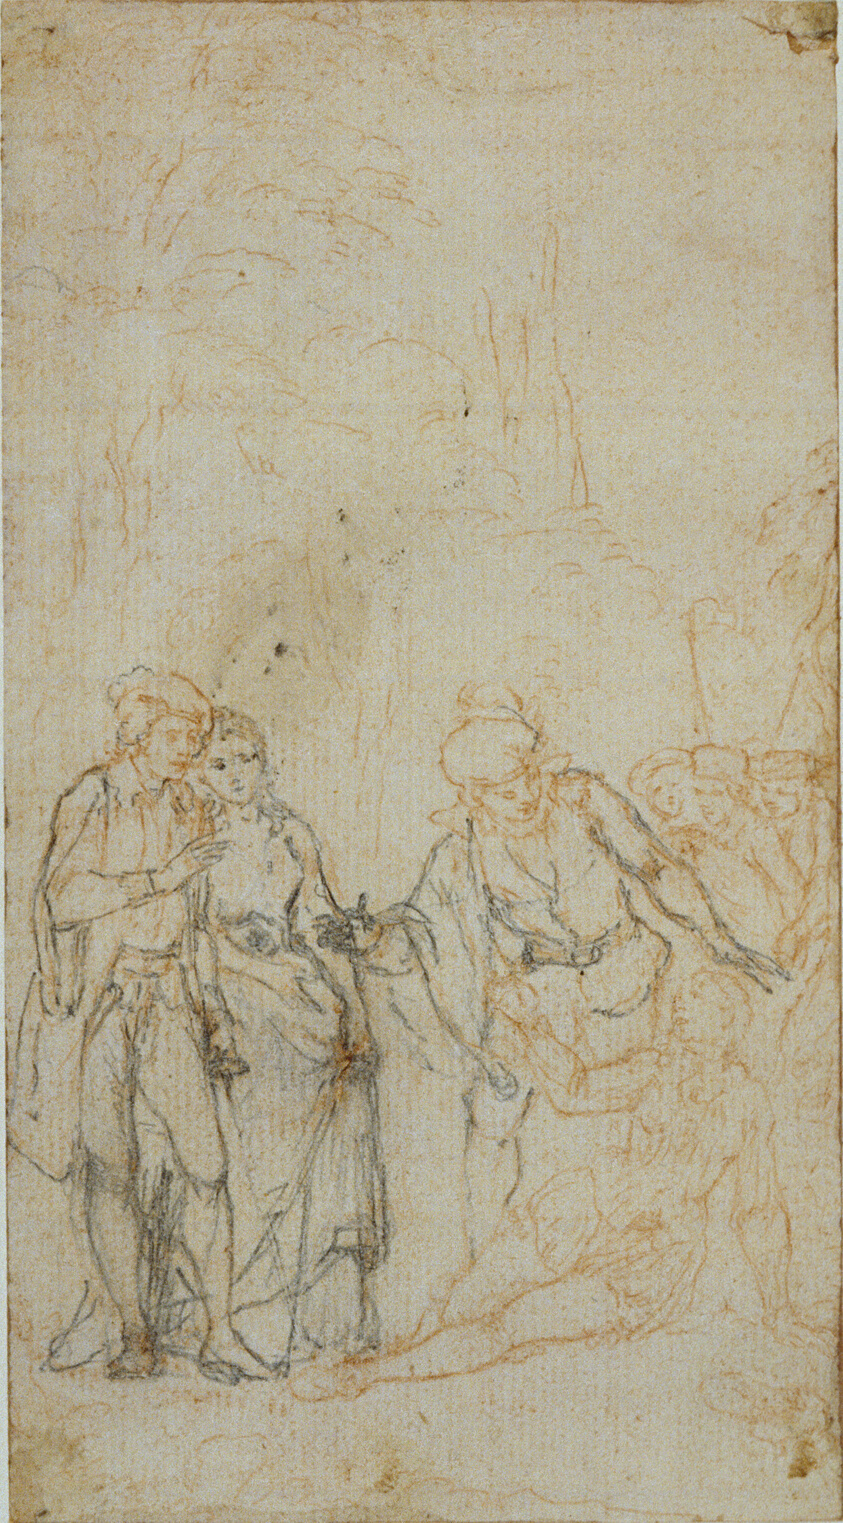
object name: Drawing and Watercolor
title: Unidentified Literary Illustration with a Group of Figures Surrounding Reclining Figure in Landscape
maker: Hubert François Gravelot (French, 1699-1773)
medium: Graphite, over red chalk, on cream laid paper, laid down on ivory laid paper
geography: France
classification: chalk; drawings (visual works); prints and drawing